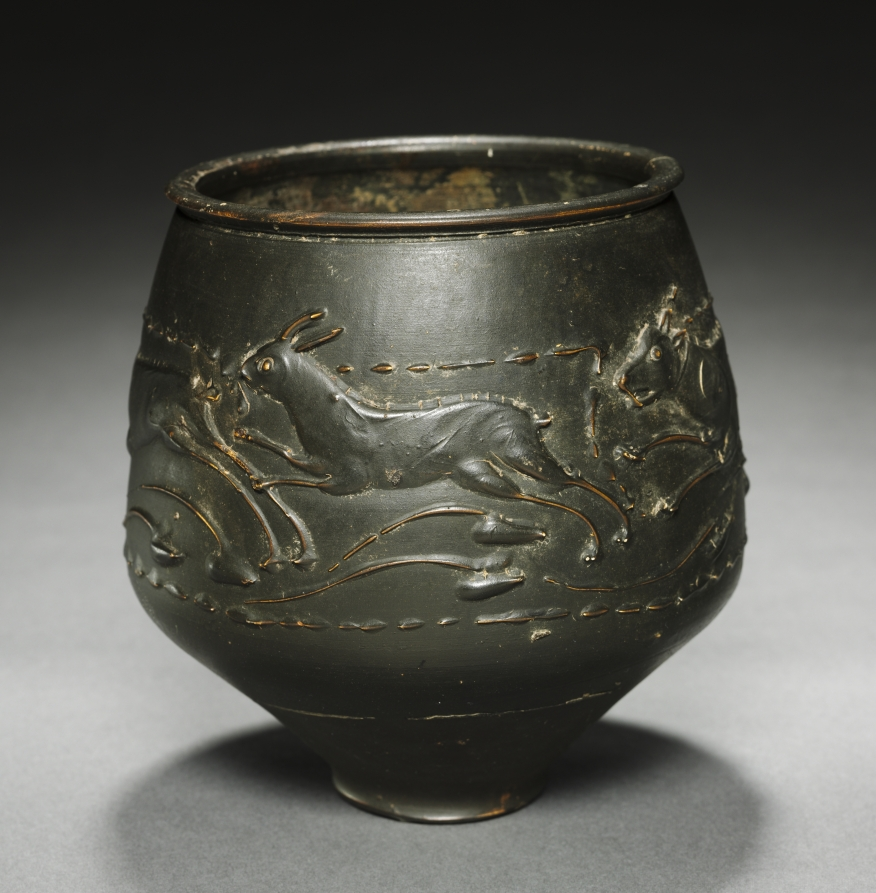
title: "Caster Ware" Vase with Hunt Scene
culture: Rhenish (Cologne), Gallo-Roman, mid-2nd Century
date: mid-100s CE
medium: reddish ware with black burnished slip and Barbotine decoration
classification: Ceramic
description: The wide body of this vase is decorated with a hunting scene in which a stag, doe, hare, and hound chase each other around the vessel. Dotted lines above and below the animals form a border around the scene, though the heads of the creatures occasionally poke above it. While larger barbotine decorations were usually mold made and applied to a leather-hard surface, the figures on our pot were piped on by hand.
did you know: “Hunt cups” like this one were a specialty of artisans working in Roman Cologne during the 2nd century CE.